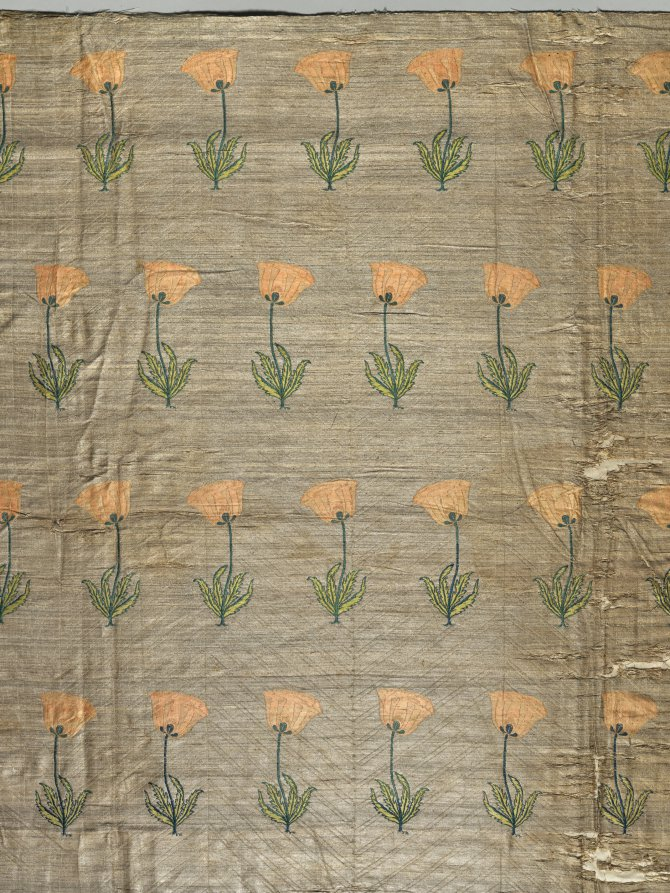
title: Textile with field of poppies on a golden ground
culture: Iran, Safavid period (1501–1722)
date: 1600–1750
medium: silk and gilt-metal thread: twill weave with supplementary weft, stamped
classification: Textile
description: Trade in textiles flourished between India and Iran. Courtly consumers from the neighboring Mughal and Safavid dynasties admired the products of both regions. The subtle chevrons set off rows of poppies that sway in alternating directions, lending a gentle liveliness to the overall pattern. Peach and green silk threads interlace to create each poppy in a technique that uses discontinuous wefts and allows for a smooth surface finish to this lightweight textile.